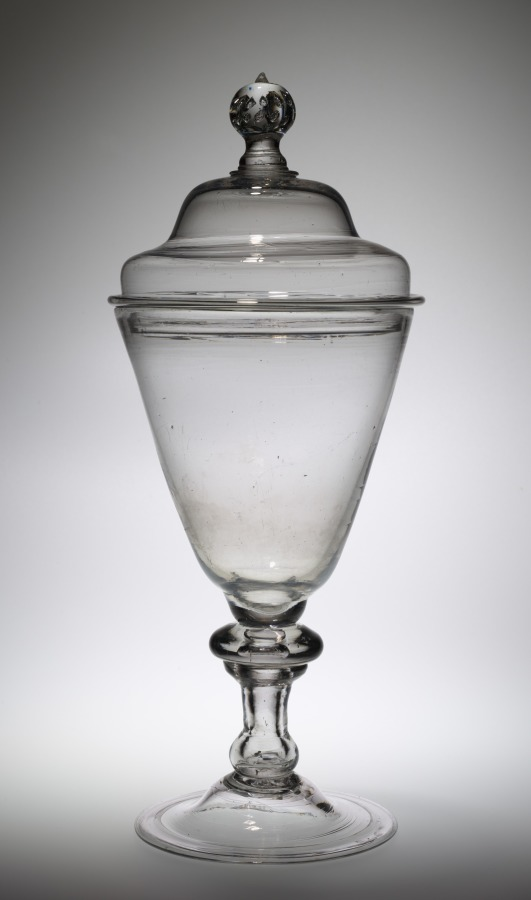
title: Flip Cup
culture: America, early 19th century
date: c. 1800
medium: glass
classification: Glass